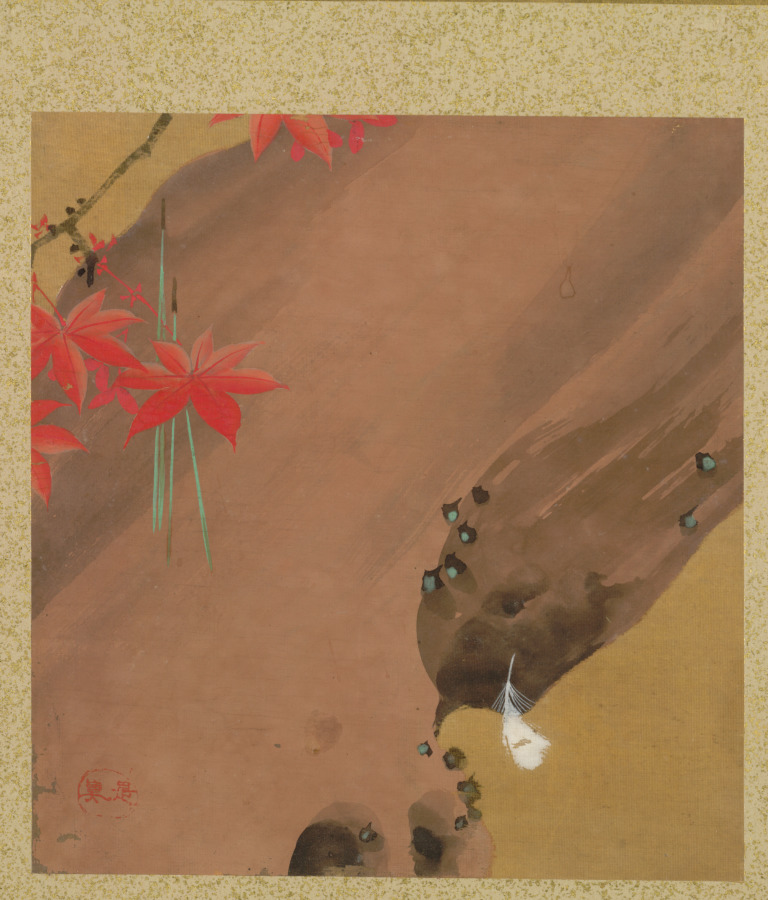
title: Maple Leaves and Feather from Album of Paintings by the Venerable Zeshin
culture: Japan, Edo period (1615–1868)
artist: Shibata Zeshin (Japanese, 1807–1891)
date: 1847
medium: leaf in accordion-style album; ink, color, and gold on silk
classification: Bound Volume